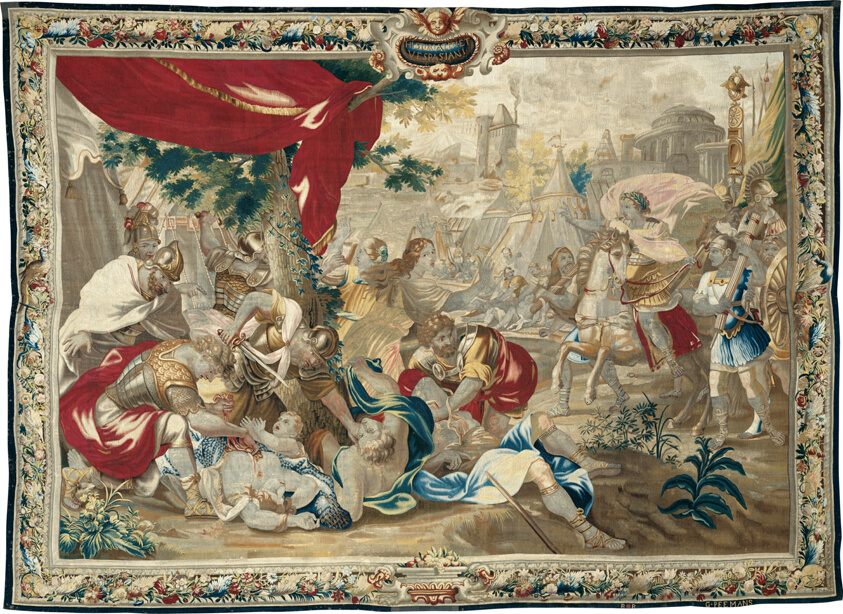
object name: Textile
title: The Massacre at Jerusalem, from The Story of Titus and Vespasian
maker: After a design by Charles Poerson (1609–1667); Woven at the workshop of Gerard Peemans (1637/39–1725); Flanders, Brussels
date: 1650/75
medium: Wool and silk, slit, dovetailed and double interlocking tapestry weave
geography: Brussels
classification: weaving - tapestry; textile